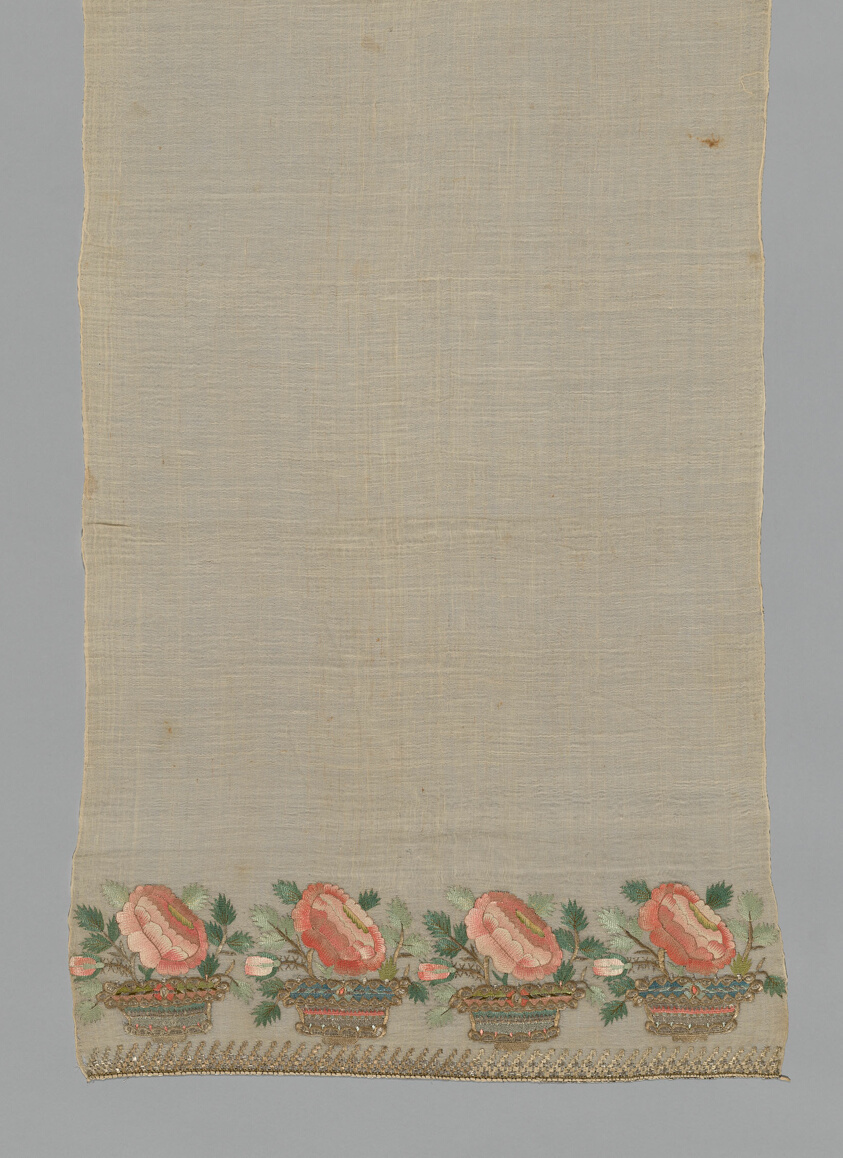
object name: Textile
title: Towel or Napkin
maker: Turkey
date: 19th century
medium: embroidered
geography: Turkey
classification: textile; needlework (visual works); weaving